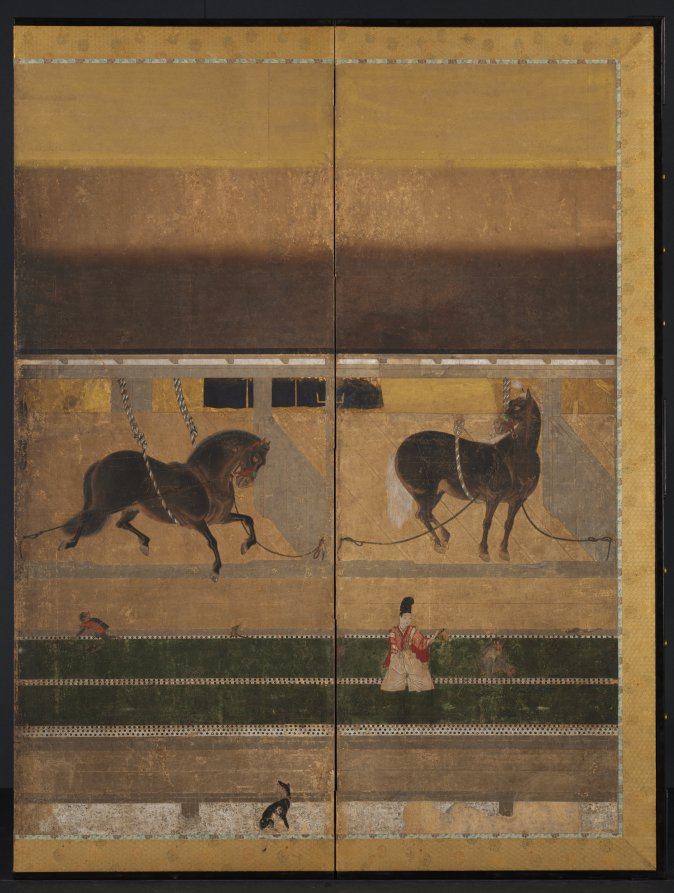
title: Horse Stable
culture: Japan, Muromachi period (1392–1573)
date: early 1500s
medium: One of a pair of six-panel folding screens; ink, color, and gold on paper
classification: Painting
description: Prized horses in stables may be the main theme of the pair of screens to which this screen belongs, but a lot of action is happening on the verandas. Here, people challenge one another at two different board games, go and shōgi. A lively atmosphere develops in the interplay of the dynamic horses and the strategic games.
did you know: Shōgi means "military leader's board game."